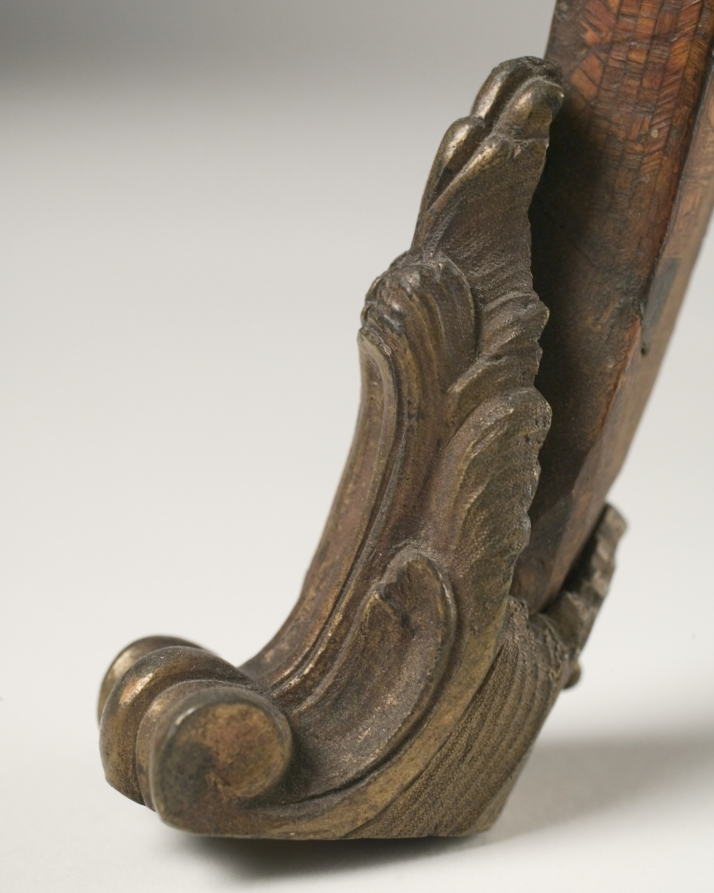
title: Ladies Writing Desk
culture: Possibly Northern Italy, near France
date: c. 1750–75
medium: Oak with straw marquetry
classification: Furniture and woodwork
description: As early as the beginning of the 17th century, straw marquetry was being produced throughout Europe. Along with cabinetmakers and specialized artisans, creators of straw marquetry included home artisans, nuns, monks, and noble dilettantes. Thus the quality and design of objects using straw marquetry is quite diverse. While some pieces appear nearly naive, others are made very masterfully, such as with this ladies writing desk. Some of these objects were even presented in royal cabinets of wonder. Because of its silky gloss and bright colors, straw marquetry was held in great esteem as unusual and remarkable decoration for furniture and other objects on par with gemstones, tortoiseshell, or ivory.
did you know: The surface of this ladies writing desk is completely covered with straw marquetry decoration both outside and in.